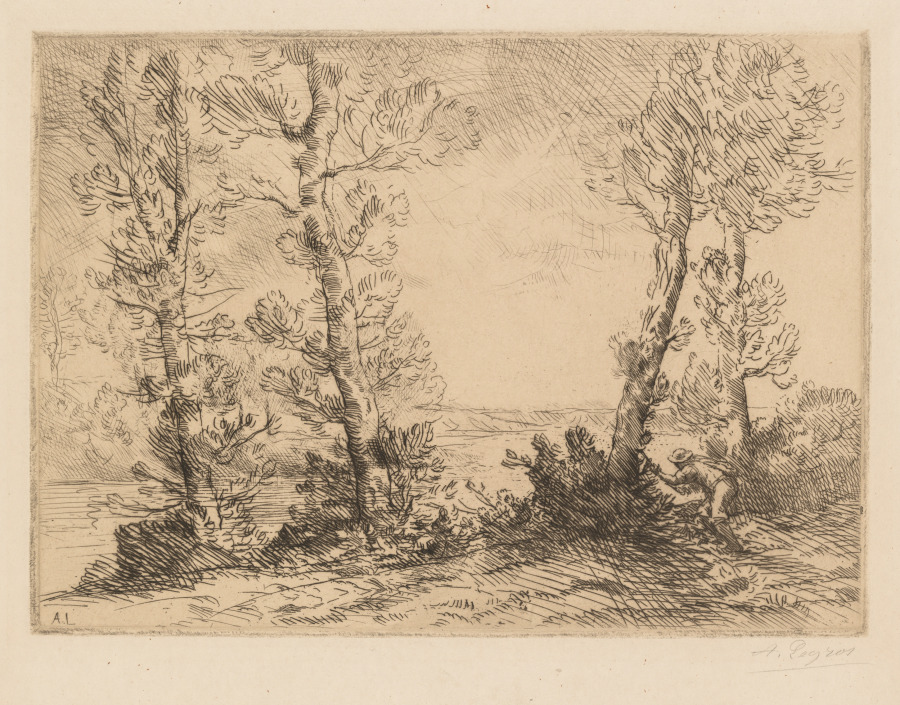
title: The Salmon Fisherman (Le Pêcheur du Saumon)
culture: France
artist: Alphonse Legros (French, 1837–1911)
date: c. 1880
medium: etching on wove paper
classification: Print